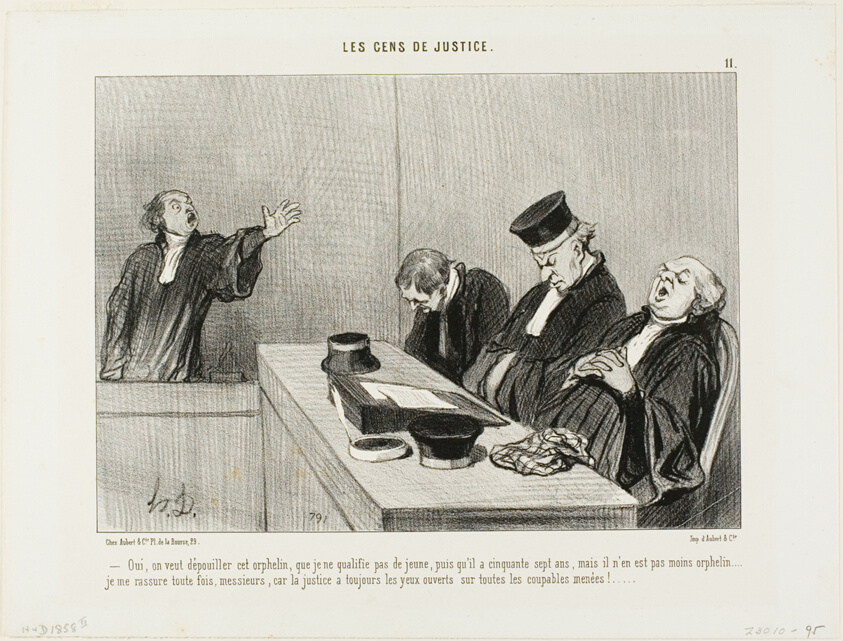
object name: Print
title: “Yes, they would plunder this orphan, whom I cannot necessarily describe as being young, since he is fifty-seven years ol...I am, reassured knowing that justice always keeps an open eye on all guilty maneuvers! . . . ,” plate 11 from Les Gens De Justice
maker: Honoré Victorin Daumier; French, 1808-1879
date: 1845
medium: Lithograph in black on white wove paper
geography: France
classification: lithograph; print; prints and drawing